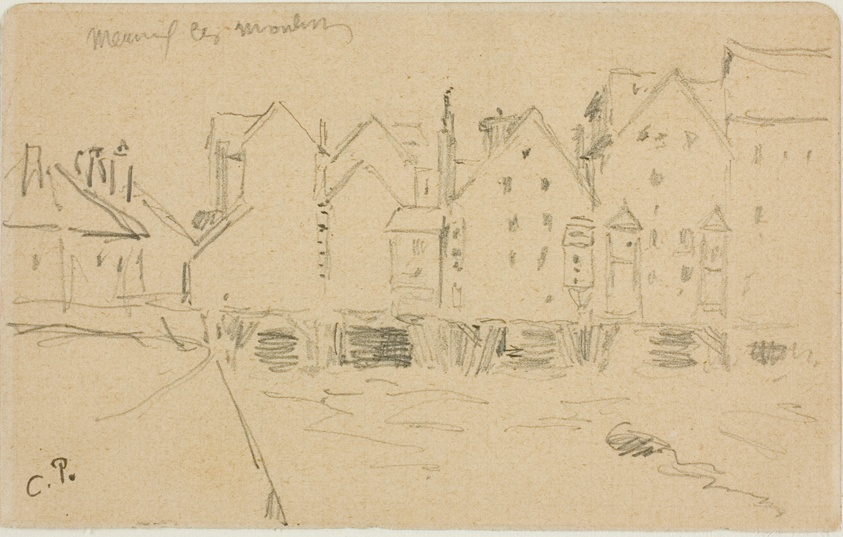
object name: Drawing and Watercolor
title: Water Mills in Meaux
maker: Camille Pissarro (French, 1830-1903)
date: c. 1898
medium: Graphite on buff wove paper (discolored to tan)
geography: France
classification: graphite; drawings (visual works); prints and drawing